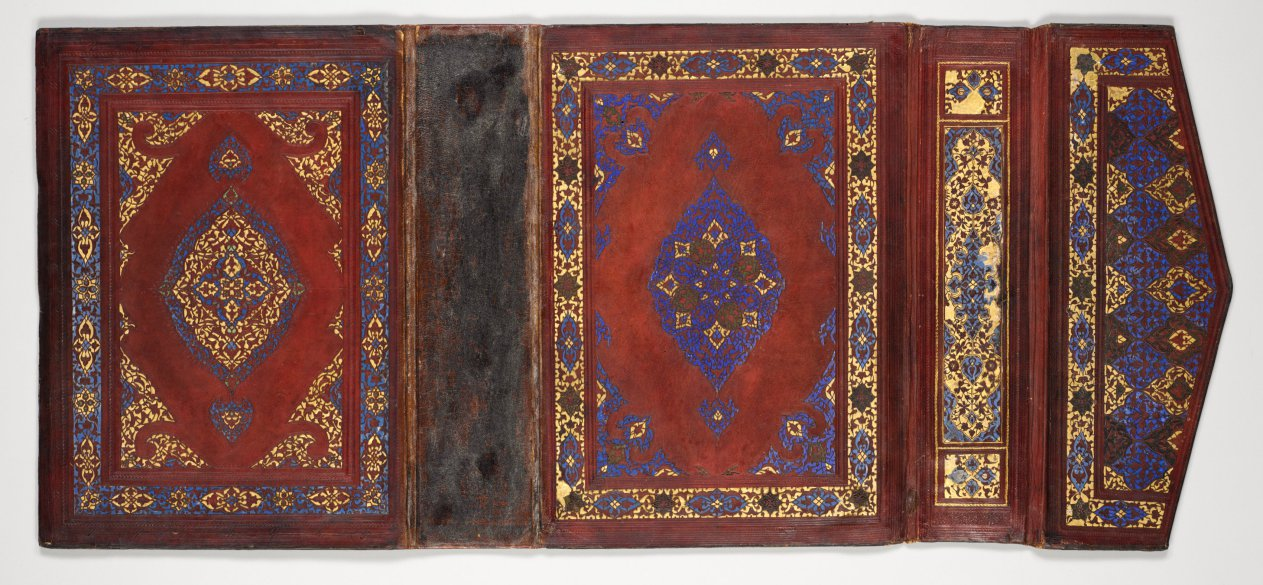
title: Bookbinding for a Qur'an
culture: Turkey, Istanbul, Ottoman period, 15th century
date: 1460–1500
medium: leather over paper pasteboards; outer cover tooled, blue paint; inner covers openwork designs over colored papers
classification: Book Binding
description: Islamic book covers generally have a triangular flap attached to the rear cover of the binding which is tucked under the front cover to protect the outside edge of the pages. The outer covers of this particularly elaborate example feature panels with Qur'anic inscriptions, interlace patterns, and a central medallion filled with floral and arabesque designs. The inner covers offer a superb example of leather openwork, a leather technique that originated in northeastern Iran in the 1400s.